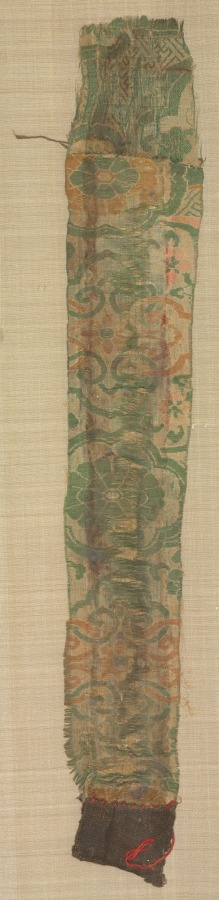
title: Vajrapani Embroidered Mount with Garuda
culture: China and Tibet, Embroidery: China, Yuan dynasty (1279-1368); painting: Tibet, 17th century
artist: Choying Dorje, the Tenth Black Hat Karmapa (Tibetan, 1604–1674)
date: painting 1600s, embroidery c. 1300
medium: Opaque watercolor, gold, and silver on silk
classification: Embroidery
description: The painting depicts the Buddhist protector who holds (pani) the thunder bolt (vajra) in his right hand. He kneels in reverence and holds his left hand in a gesture of salute. This unusual image appears to have been the vision of a Tibetan monastic patriarch known for creating his own inventive paintings and sculptures. Sewn to the painting are Chinese damask borders and rare embroideries dating to the Chinese Yuan dynasty (1279–1368). They depict man-eagle figures known as Garuda, a form occasionally assumed by Vajrapani.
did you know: Vajrapani sometimes takes the form of Garuda, enemy of snakes.